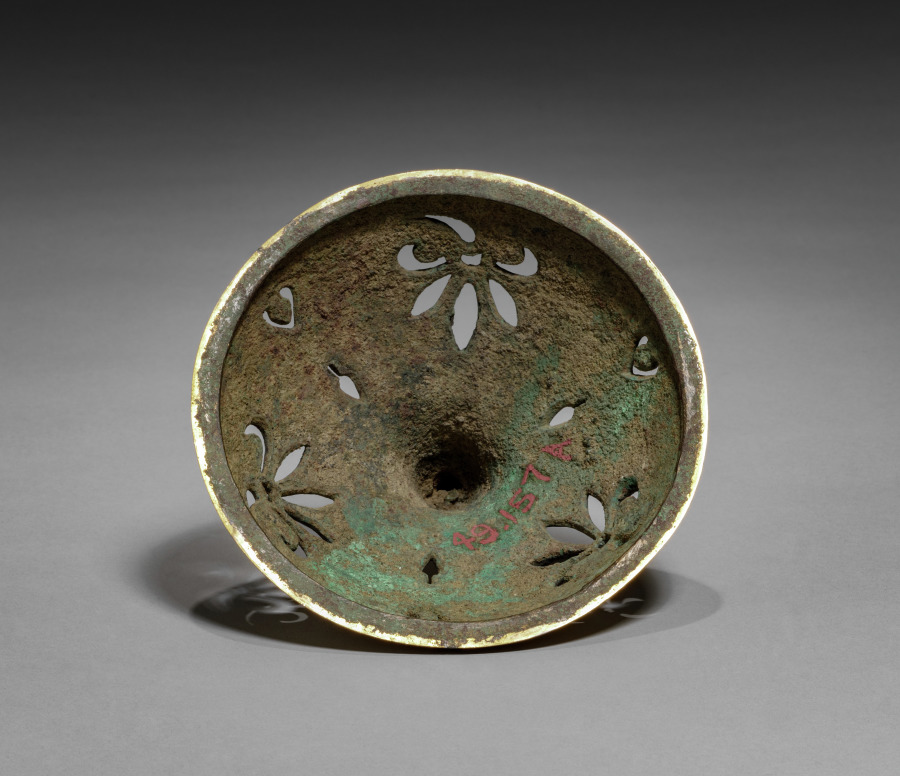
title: Censer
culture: China, Tang dynasty (618-907)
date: early 600s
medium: gilt bronze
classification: Metalwork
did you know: The censor's pointed cover is decorated with openwork floral motifs.